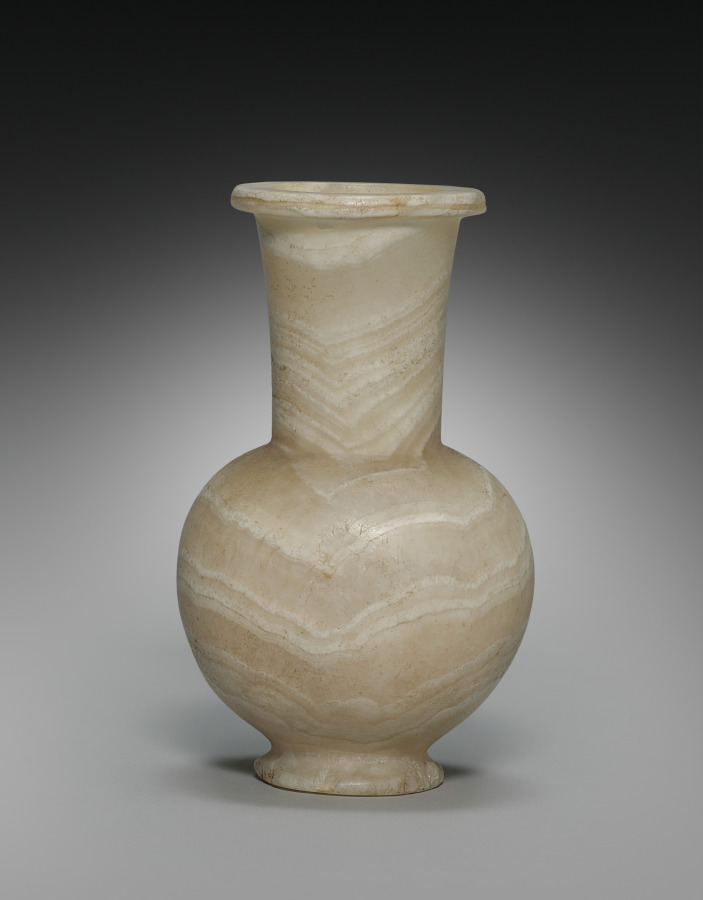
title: Long-Necked Flask with Lid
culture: Egypt, New Kingdom (1540–1069 BCE), Dynasty 18, reign of Tuthmosis III (1479–1425 BCE)–reign of Amenhotep III (1390–1352 BCE)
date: 1401–1353 BCE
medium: travertine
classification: Vessels